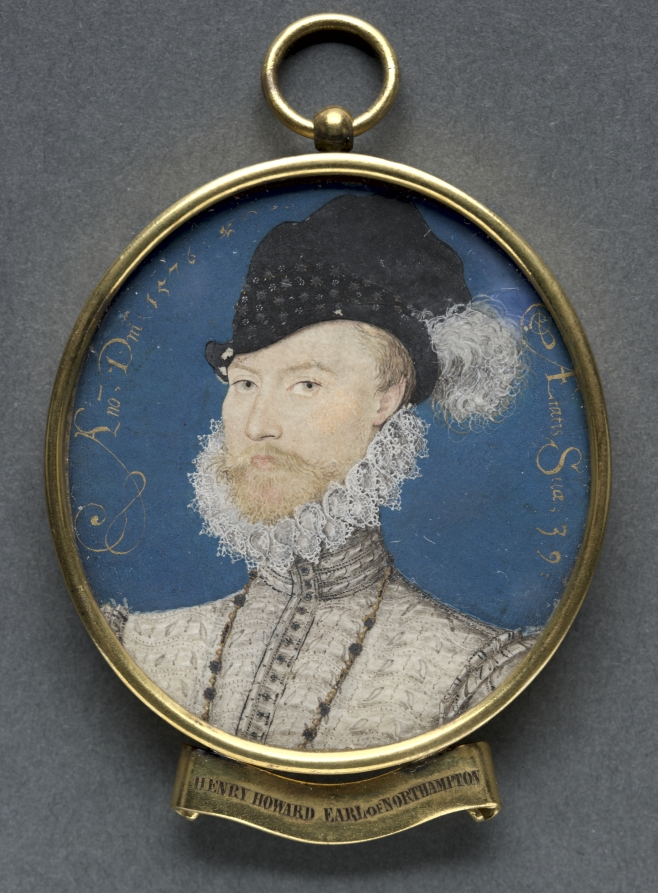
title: Portrait of Charles Howard, 2nd Baron Howard of Effingham, later 1st Earl of Nottingham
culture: England, 16th century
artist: Nicholas Hilliard (English, c. 1547–1619)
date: 1576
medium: watercolor on vellum in a gilt metal frame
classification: Portrait Miniature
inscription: inscribed from left: Ano, Dm. 1576: / AEtatis Suae; 39.